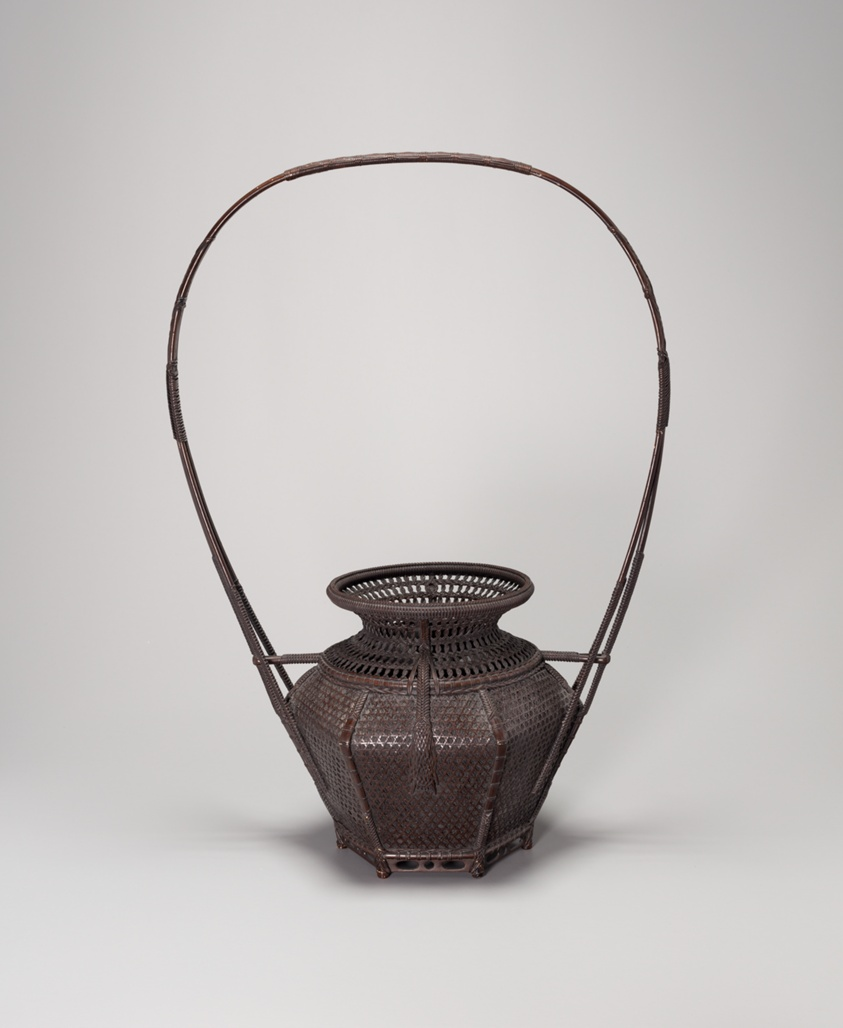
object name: Decorative Arts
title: Peony Basket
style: Japanese (culture or style)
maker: Wada Rinshi (Japanese, active late 18th or early 19th century)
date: c.1800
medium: Bamboo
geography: Japan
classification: basketry; decorative arts